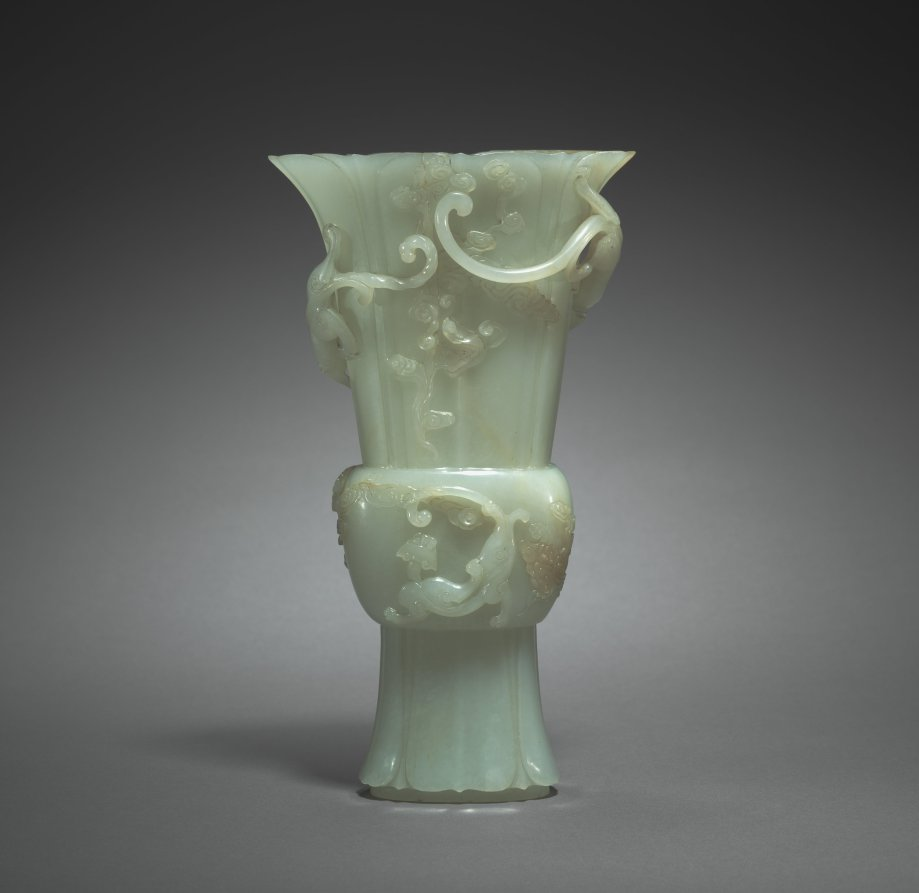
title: Vase in Form of Archaic Zun with Dragons in Relief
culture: China, Qing dynasty (1644–1911), Qianlong reign (1736–95)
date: 1736–95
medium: white jade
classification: Jade